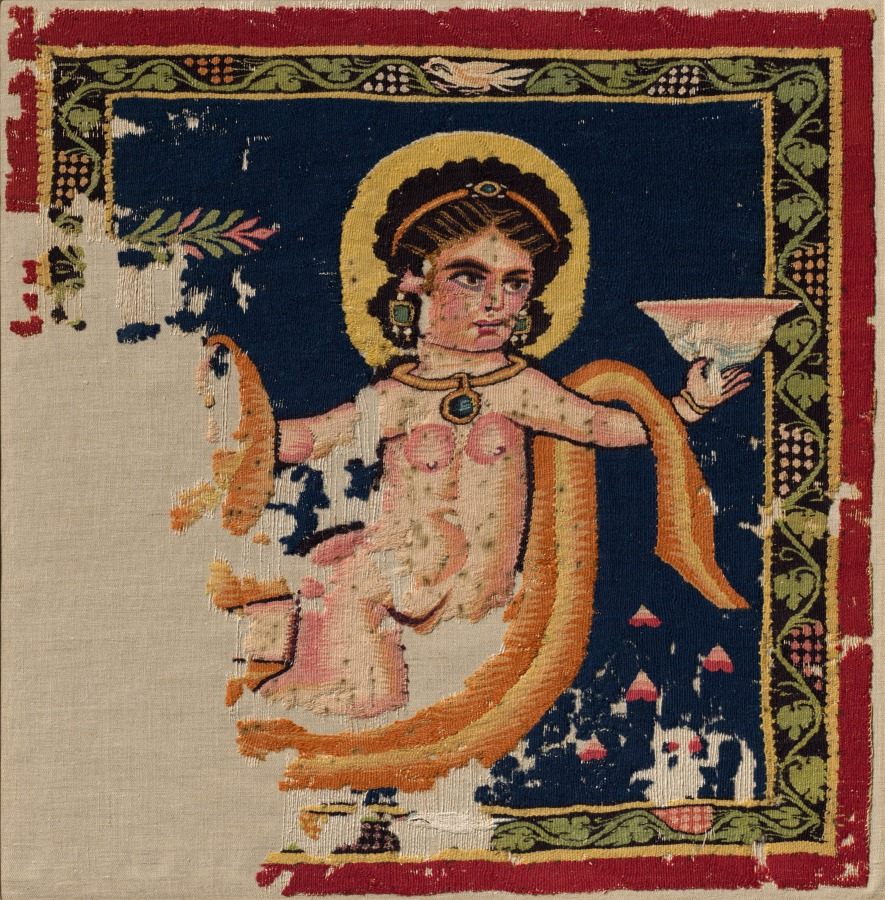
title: Nereid (Sea-Nymph) from a Hanging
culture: Byzantine Empire (Egypt)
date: late 300s–400s CE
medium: dyed wool, undyed linen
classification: Textile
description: The brilliant colors and complex design of this panel, likely one of several forming a tapestry, testify to its makers’ skill. Vines and birds frame a nereid, a mermaidlike mythological creature, against a dark blue ground. The weaver has aligned different-colored threads to create shading and special details. Blue threads representing water are integrated into the weaving of the glass bowl. Alternating pink and blue threads combine to create a smoky effect around the nereid’s eyes. Small spots across the surface are stable organic spores and fortunately do not affect the condition of this millennia-old textile.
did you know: Look closely at the eyeliner beneath the eye: it is formed by mixing two colors of thread, pink and blue.